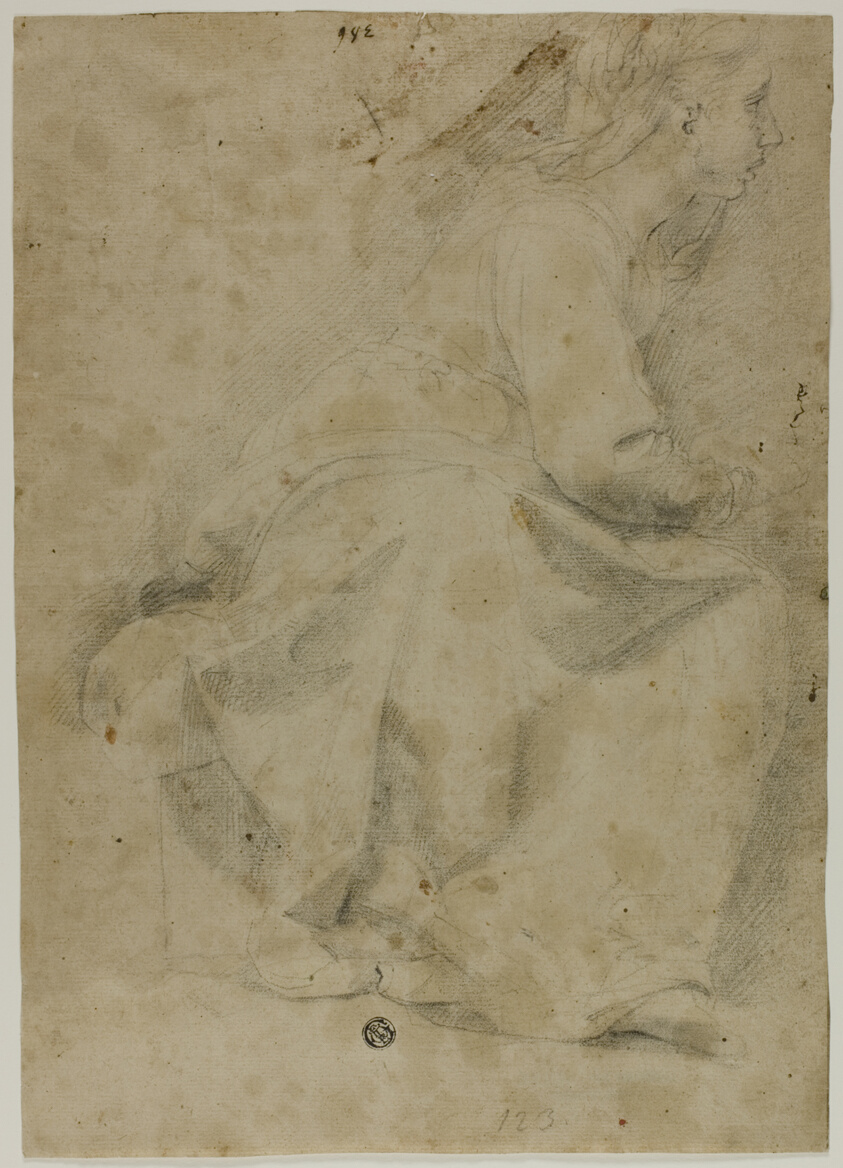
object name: Drawing and Watercolor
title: Seated Woman in Profile to Right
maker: Possibly Domenico Fiasella; Italian, 1589-1669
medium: Black chalk on tan laid paper, laid down on gray laid paper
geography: Italy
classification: chalk; drawings (visual works); prints and drawing